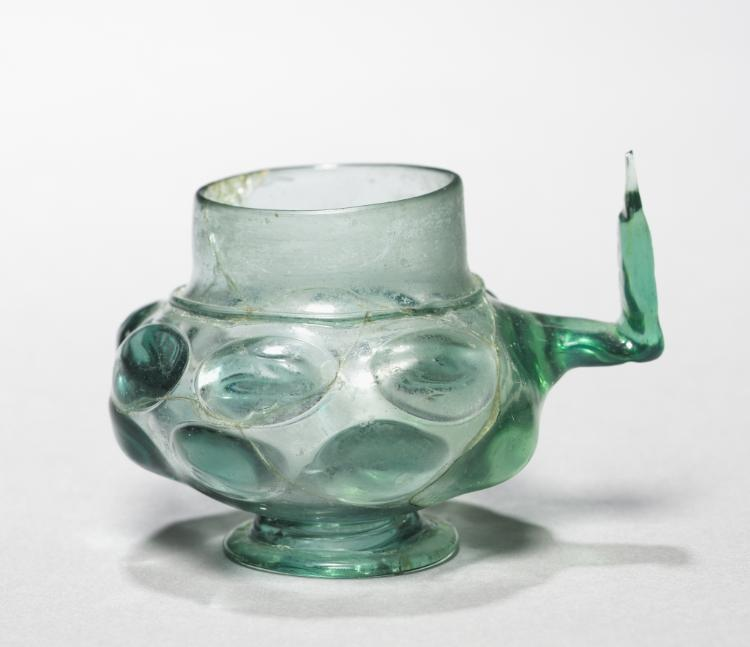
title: Footed Cup with Handle (Scheuer)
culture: Germany, probably Saxony, 16th century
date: c. 1500–1525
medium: green glass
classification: Glass